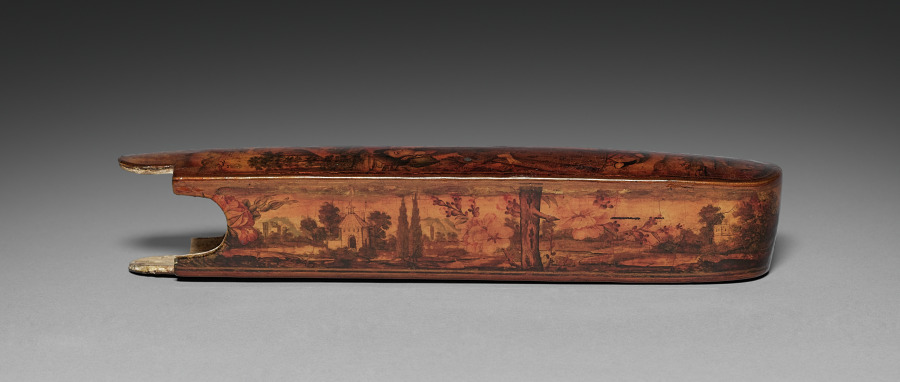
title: Pen and Ink Box (lid)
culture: Iran, probably Isfahan, Safavid period (1501–1722)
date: 1667–98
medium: Varnished lacquer and opaque watercolor over papier-mâché, ink, and copper alloy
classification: Lacquer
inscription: 1109